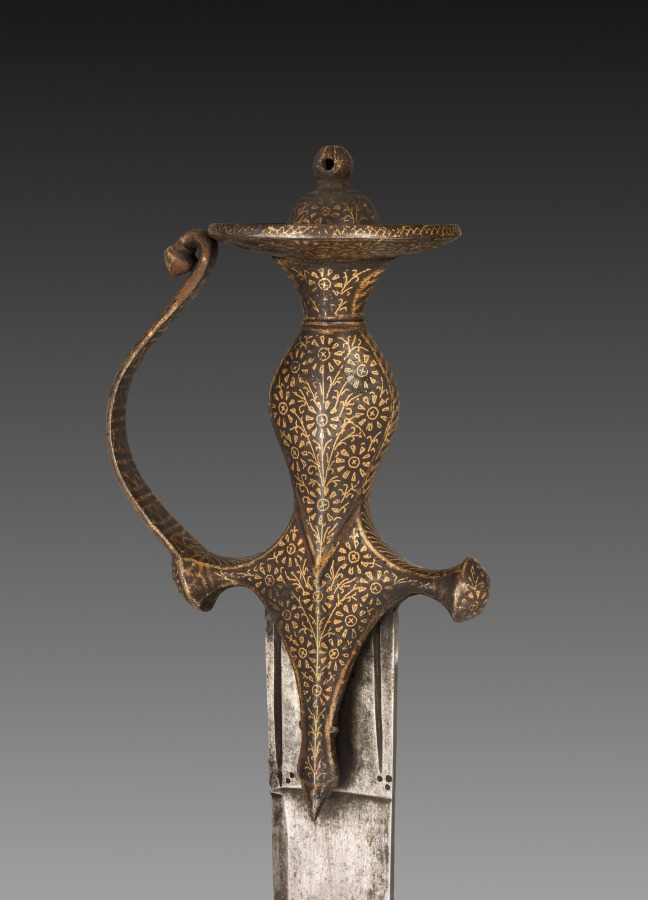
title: Tulwar sword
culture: India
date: before 1919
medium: iron with gold inlay; steel blade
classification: Arms and Armor